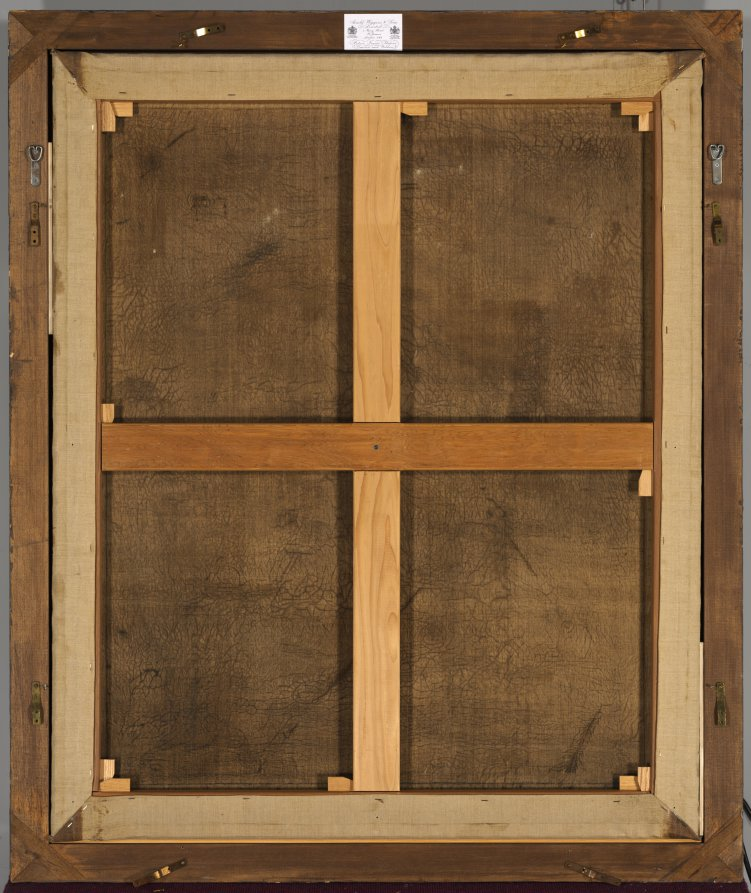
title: Saint Jerome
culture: Flanders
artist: Hendrick ter Brugghen (Dutch, 1588–1629)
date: c. 1621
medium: oil on canvas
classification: Painting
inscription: Signed and dated upside down on open book: "H TBrugghen 1621"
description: Not all subjects are easy to identify. This museum long thought that the subject was the Greek philosopher Heraclitus, largely because tears are part of the standard representation of this ancient thinker. However, ter Brugghen omits the other crucial key to identifying Heraclitus--a globe over which he weeps. Instead, the book and skull indicate that the figure is Saint Jerome, known for translating the Bible into Latin. The artist probably chose to show Jerome crying to intensify his penitence.